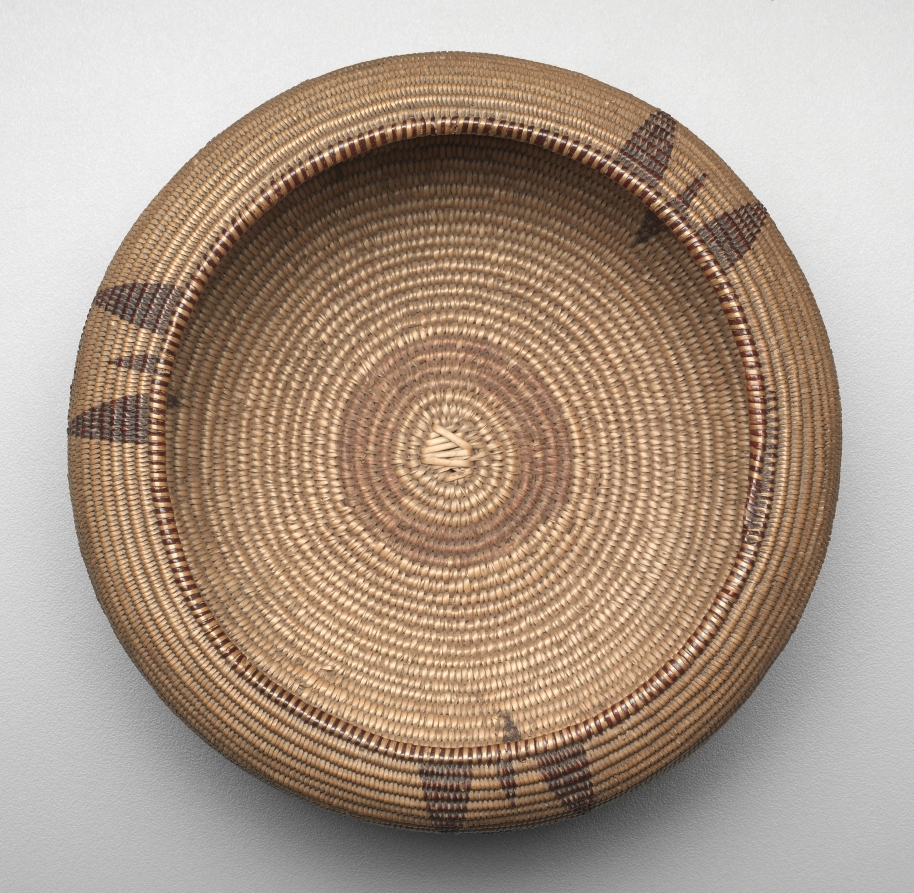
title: Bowl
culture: Great Basin, Washoe, Late 19th- Early 20th century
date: 1890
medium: Redbud, Willow; coiled (3 rods)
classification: Basketry